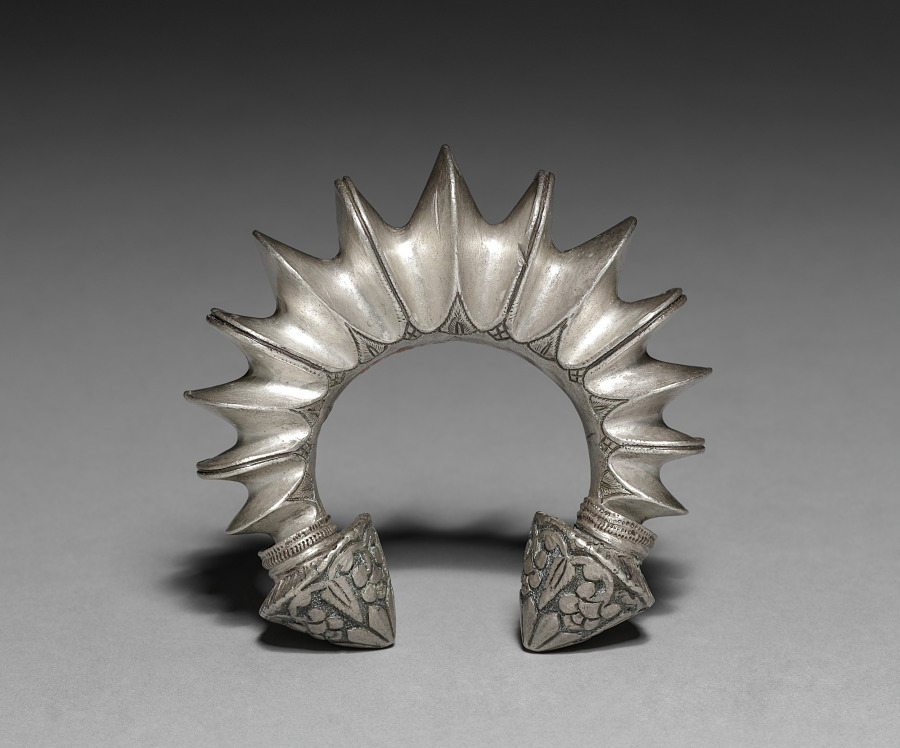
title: Bracelet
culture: India, Punjab (?) or Sind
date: 1800s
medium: silver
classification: Jewelry